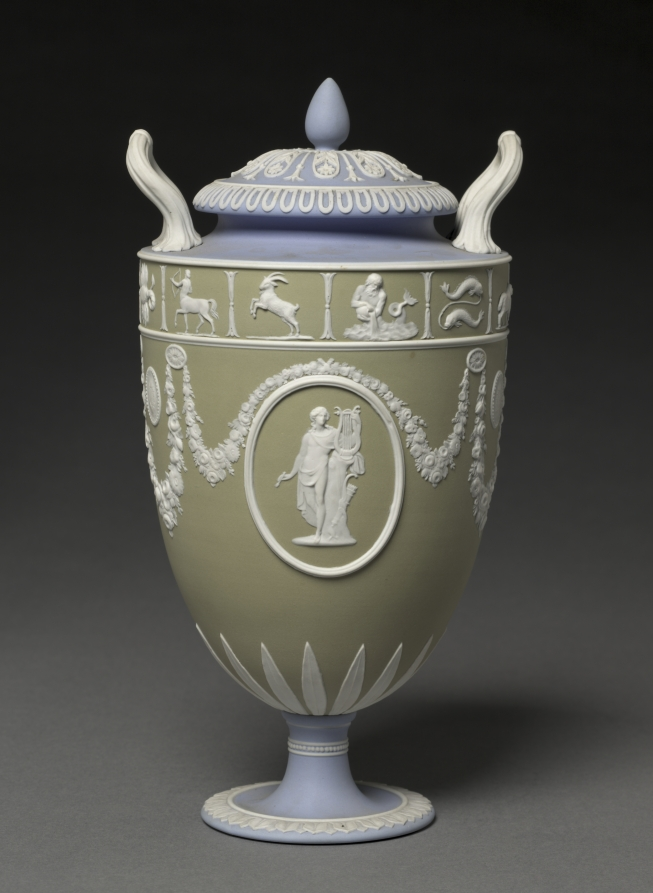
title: Covered Vase (one of a pair)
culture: England, Staffordshire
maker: Josiah Wedgwood and Sons (British, Staffordshire, est. 1759)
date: c. 1850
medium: jasper ware with relief decoration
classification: Ceramic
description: Wedgwood's tricolor jasperware first became popular in the 1770s during a period of fascination with neoclassical decoration. This vase was probably made around 1850 during the period when this type of decoration was revived. The relief medallions depict two versions of the Greek god Apollo, the god of music, next to his harp or lyre.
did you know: Signs of the zodiac form a decorative border around the upper portion of this vase.